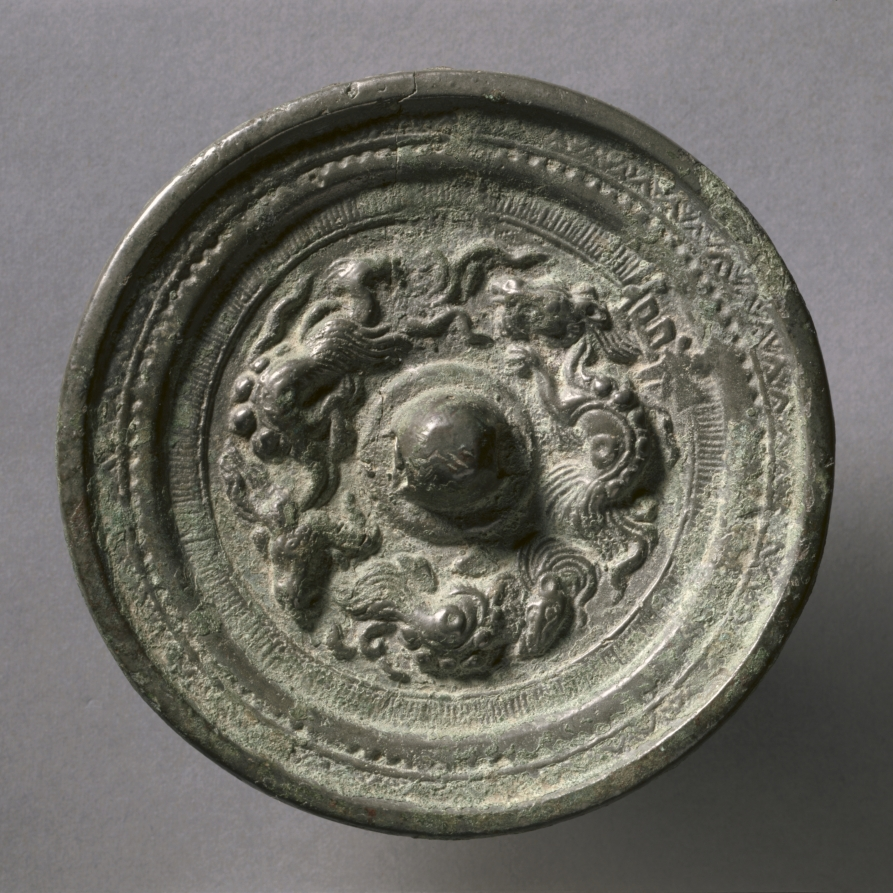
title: Mirror with Three Dragons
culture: China, Jin dynasty (1115-1234)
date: early 1100s–early 1200s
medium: bronze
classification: Metalwork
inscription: an unidentified cipher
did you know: Mirrors typically have one polished and one decorated side and were used in part in tombs for ritual purpose or served as disks for reflection.